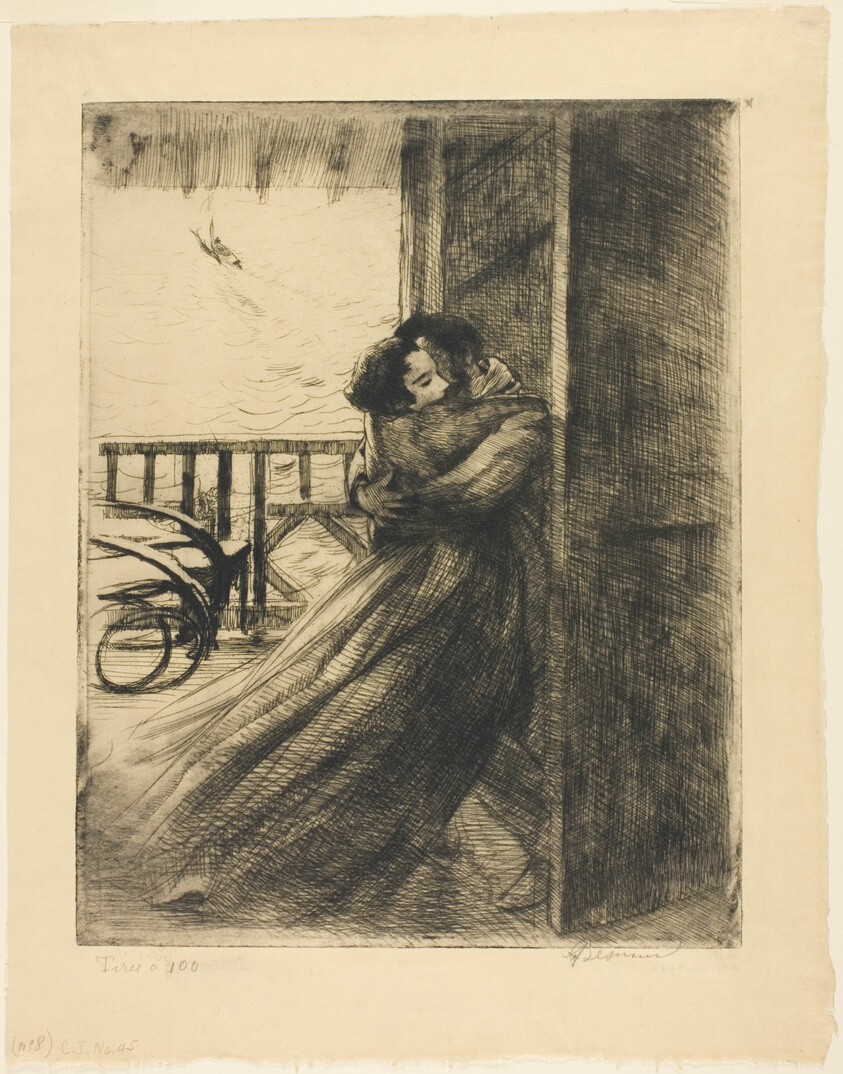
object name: Print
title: Love, plate two from Woman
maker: Albert Besnard (French, 1849-1934)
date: c. 1886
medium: Etching, drypoint and retroussage inking in black ink on cream Japanese paper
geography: France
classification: etching; print; prints and drawing